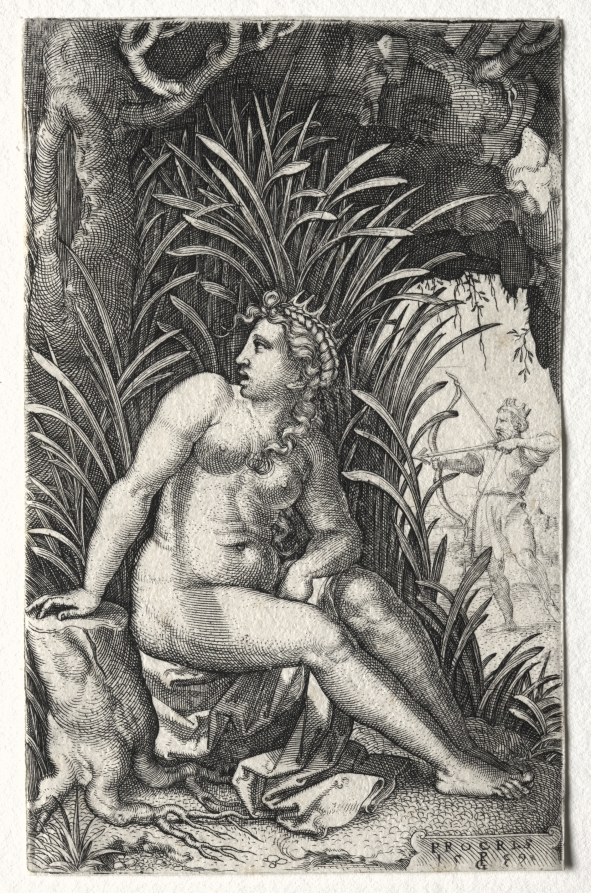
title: Procris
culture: Germany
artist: Georg Pencz (German, c. 1500–1550)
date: 1539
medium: engraving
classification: Print